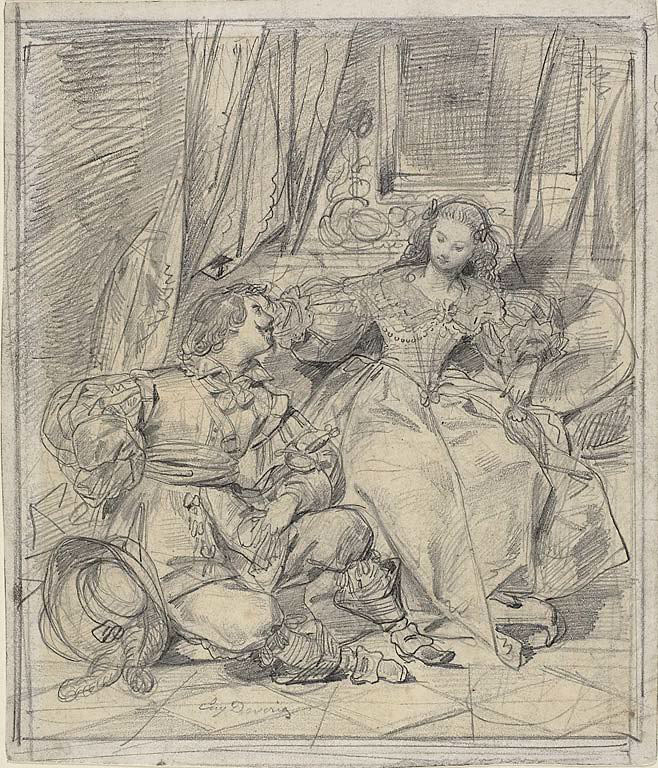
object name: Drawing and Watercolor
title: Lady and Cavalier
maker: Eugène Devéria; French, 1805-1865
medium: Graphite, on ivory wove paper, discolored to cream, perimeter mounted on cream board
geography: France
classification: graphite; drawings (visual works); prints and drawing